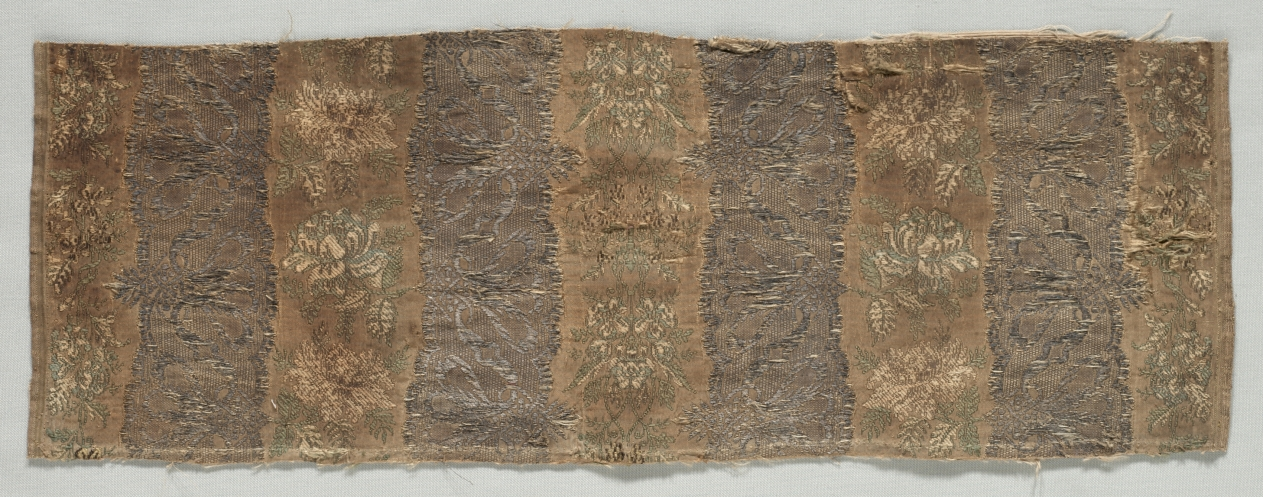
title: Textile Fragment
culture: Italy, 18th century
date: 1700s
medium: brocaded silk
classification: Textile